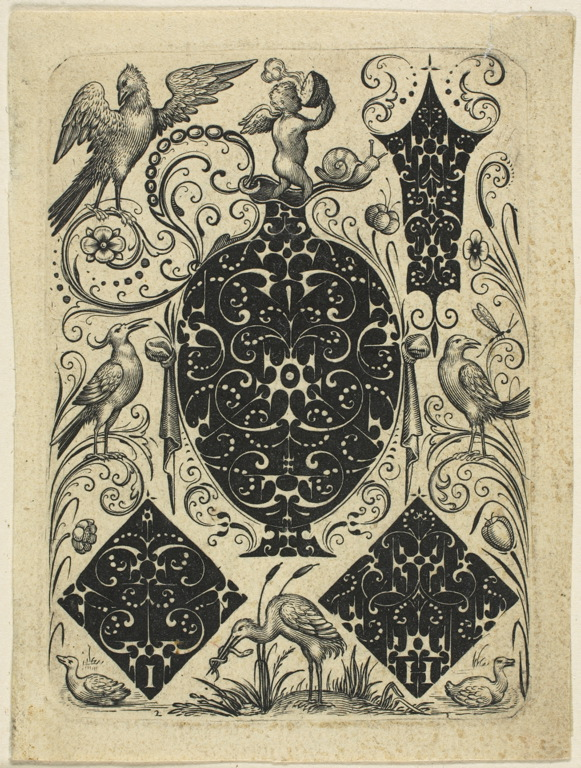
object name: Print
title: Ornamental Plate VI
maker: Jacques Hurtu (French, flourished 1614-19-died before 1623)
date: c. 1619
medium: Engraving on paper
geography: France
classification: engraving; print; prints and drawing